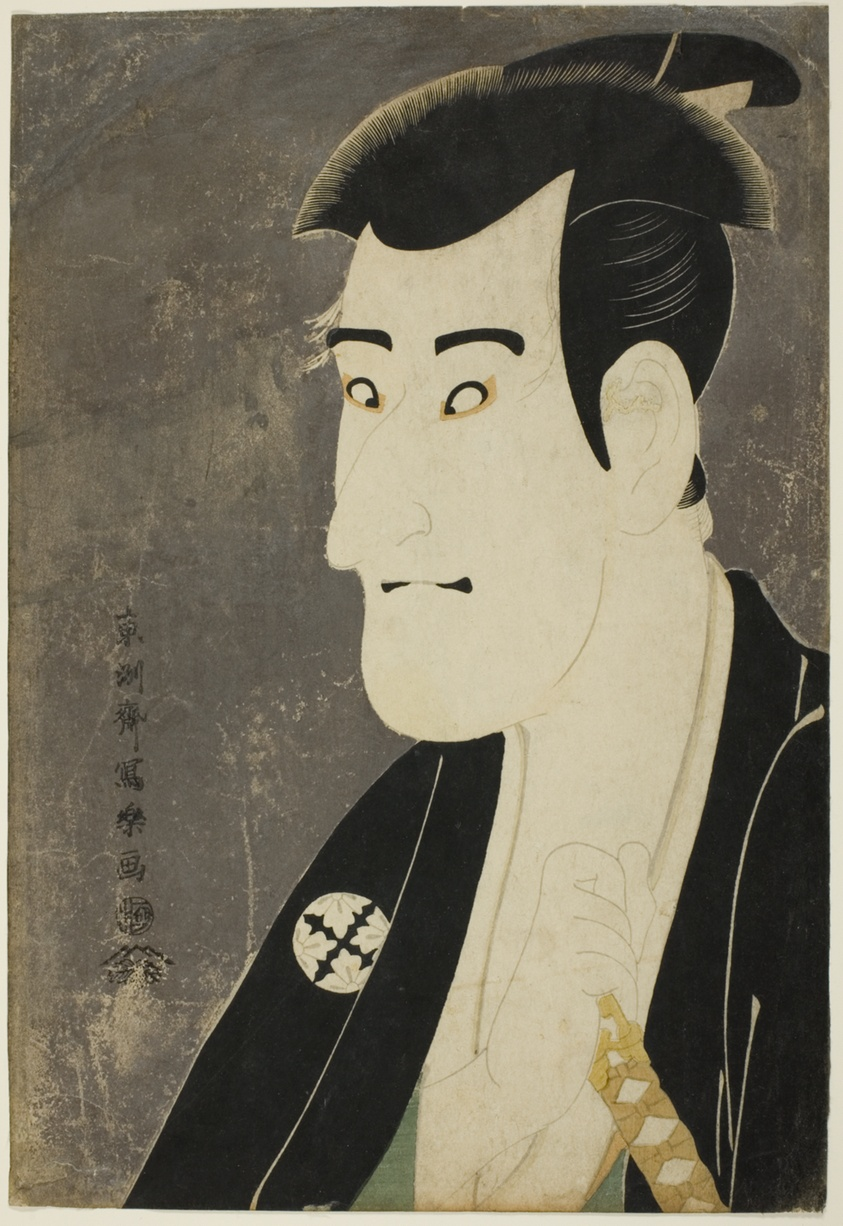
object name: Print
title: The actor Ichikawa Komazo III as Shiga Daishichi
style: Japanese (culture or style)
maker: Toshusai Sharaku 東洲斎 写楽; Japanese, active 1794-95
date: 1794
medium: Color woodblock print; oban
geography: Japan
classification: woodblock print; print; asian art